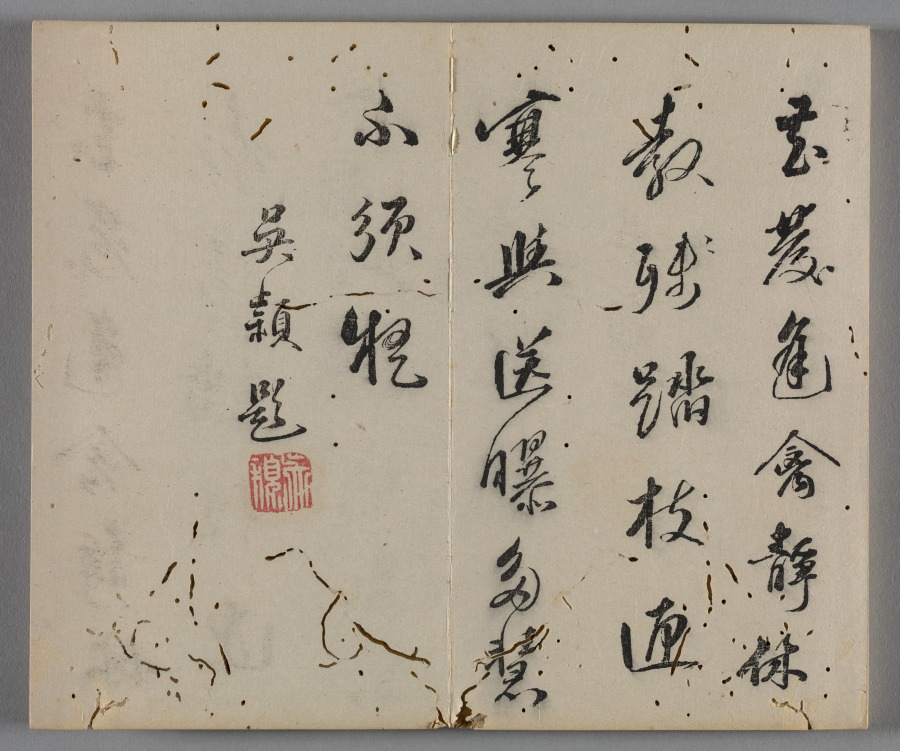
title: Ten Bamboo Studio Painting and Calligraphy Handbook (Shizhuzhai shuhua pu): Birds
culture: China, Qing dynasty (1644-1911)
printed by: Hu Zhengyan (Chinese, c. 1584–1674)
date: 1633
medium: Woodblock-printed book; ink and colors on paper; first edition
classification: Print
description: Color printing reached a level of perfection in the early 1600s, as seen in this Ten Bamboo Studio Collection of Calligraphy and Painting and the Mustard Seed Garden Manual of Painting (printed 1679 and 1701). The painterly quality, precision in registering (aligning) the woodblocks, and harmonious colors made them the most successful color print editions in Chinese history. Both editions were printed and compiled in Nanjing, spread nationwide, and had a great impact on the arts in Japan and Korea.